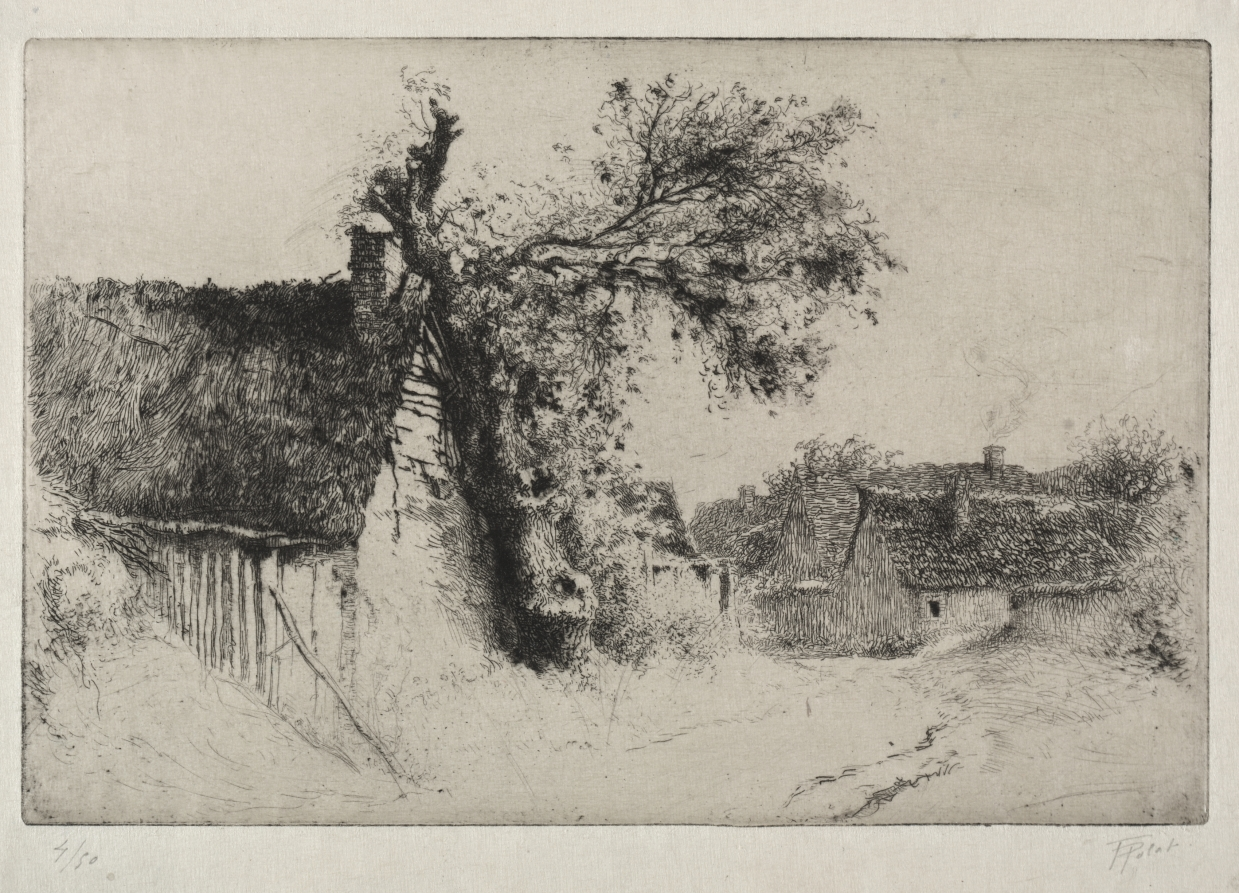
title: The Old Elm Tree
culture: France, 20th century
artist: Tigrane Polat (French, 1874-)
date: 1900?–1925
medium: etching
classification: Print